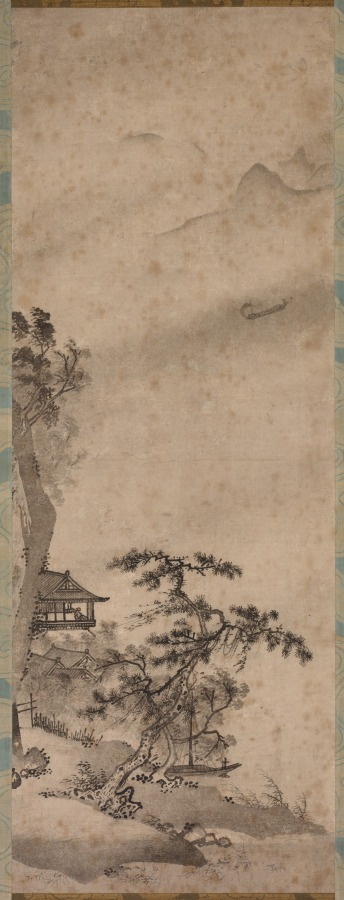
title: Windy Landscape with Sailboat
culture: Japan, Muromachi period (1392–1573)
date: mid-1400s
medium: hanging scroll; ink on paper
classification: Painting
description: Windy Landscape depicts the humble waterside retreat of an official retired from government service. For government officials, retreating from the city to a remote locale was the ideal retirement, though difficult to attain. In this scroll the retiree gazes out over the watery expanse past the sailboat to the mist-covered mountain in the far distance. The artist has achieved this depth of composition through carefully placed brushstrokes and ink washes.